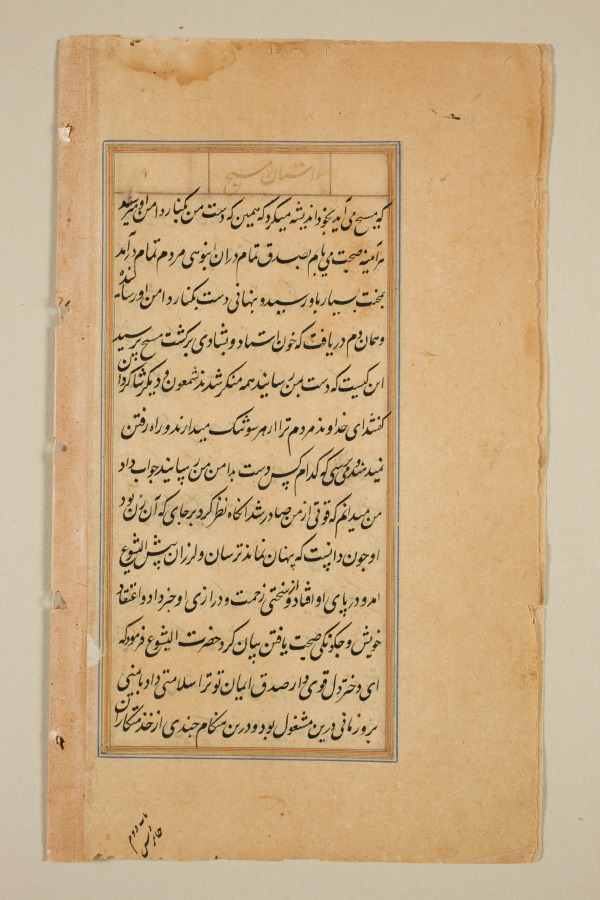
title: Text page from a Mirror of Holiness (Mir’at al-quds) of Father Jerome Xavier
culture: Mughal India, Allahabad, made for Prince Salim (1569–1627)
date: 1602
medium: Ink and gold on paper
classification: Manuscript